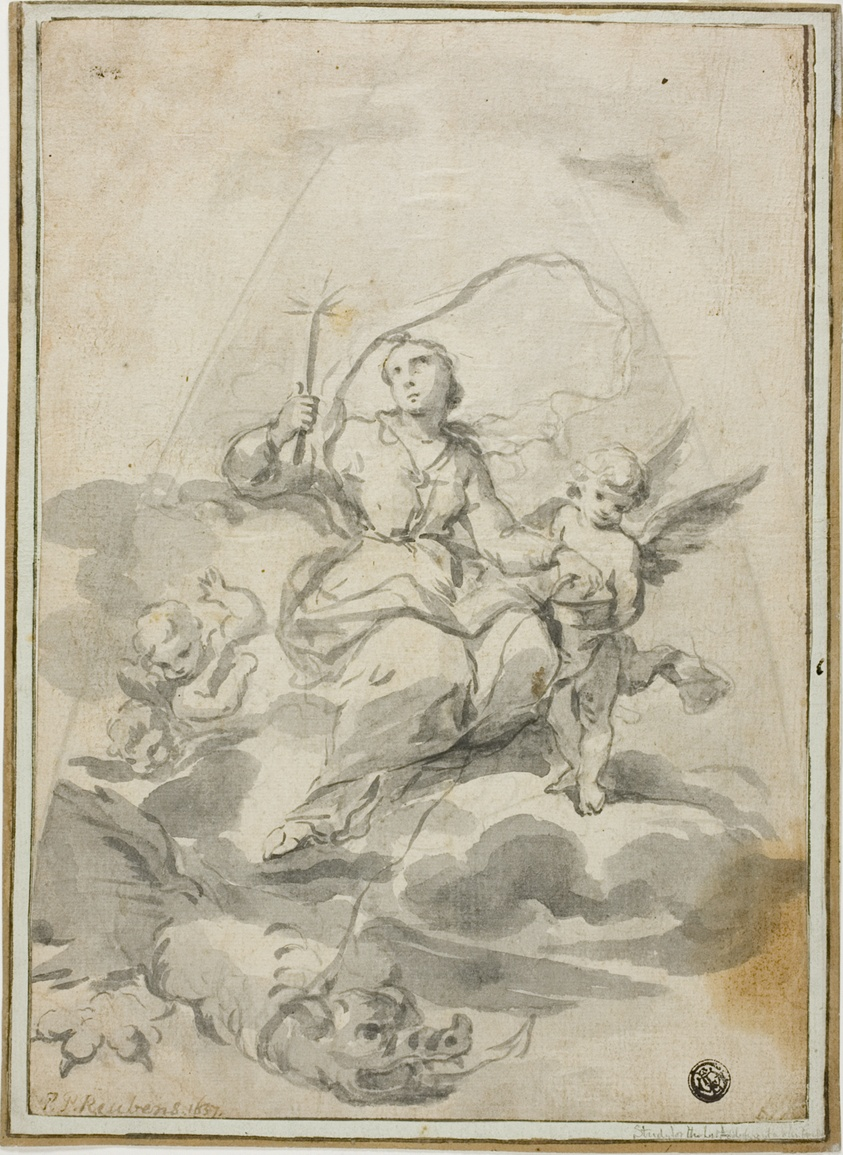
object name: Drawing and Watercolor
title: Saint Margaret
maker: Godfried Maes (Flemish, 1649-1700); or Peter Paul Rubens (Flemish, 1577-1640)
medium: Brush and gray wash, over traces of graphite, on ivory laid paper, laid down on blue laid paper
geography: Flanders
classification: ink or chalk wash; drawings (visual works); prints and drawing